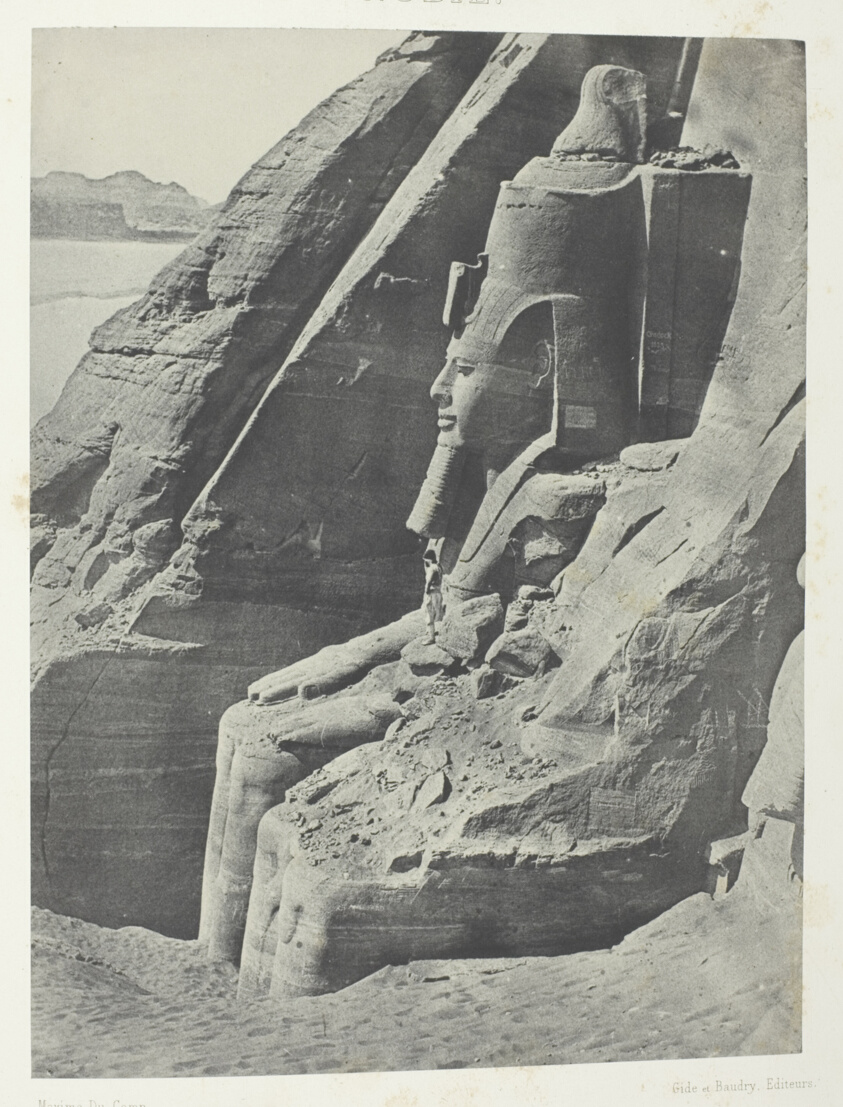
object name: Photograph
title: Ibsamboul, Colosse Oriental Du Spéos De Phrè, Vu De Profil; Nubie, plate 104 from the album "Egypte, Nubie, Palestine et Syrie" (1852)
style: 19th century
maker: Maxime Du Camp (French, 1822–1894)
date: 1849/51, printed 1852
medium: Salted paper print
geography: France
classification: salted paper print; photographic process; photography; photograph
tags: Collected by Hugh Edwards, Egypte, Nubie, Palestine et Syrie